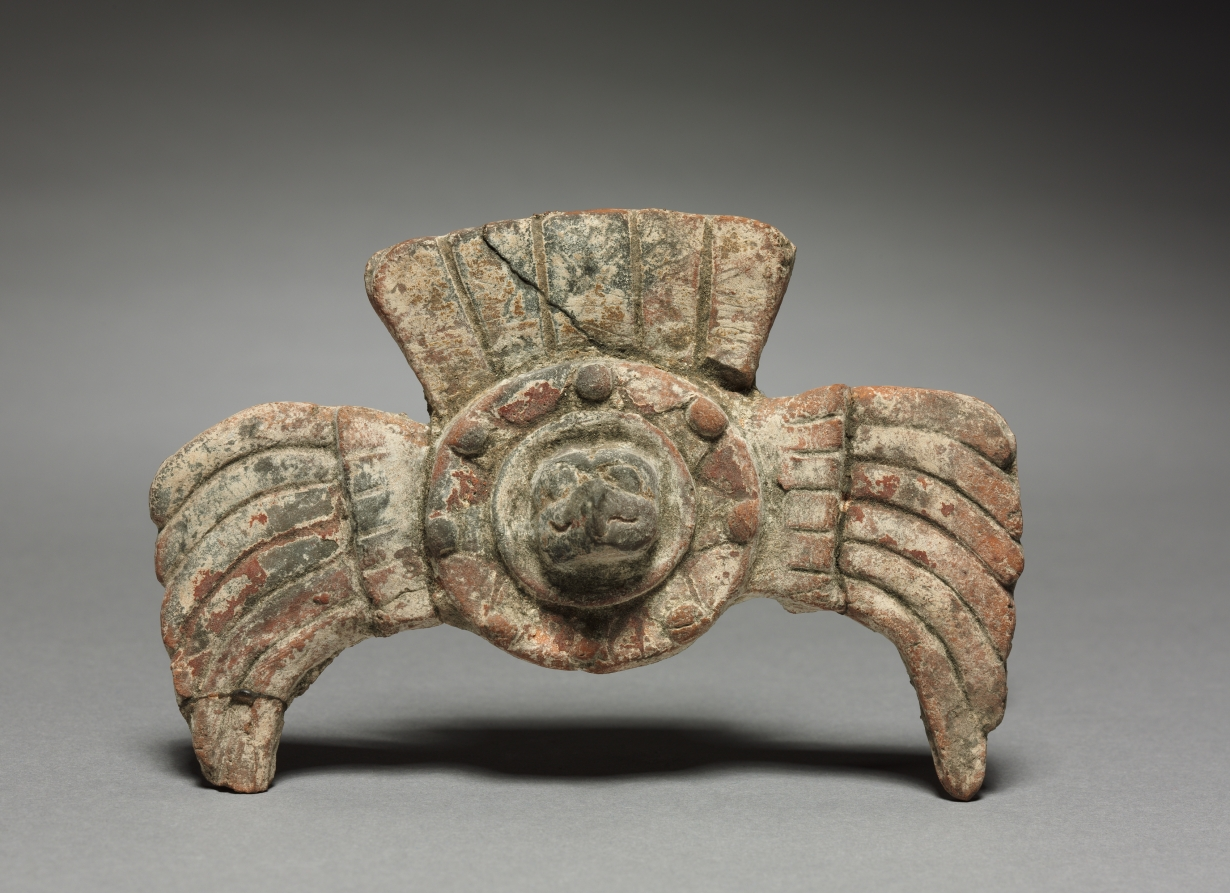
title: Headdress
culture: Mexico, Teotihuacan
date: 1–750 CE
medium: pottery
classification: Ceramic